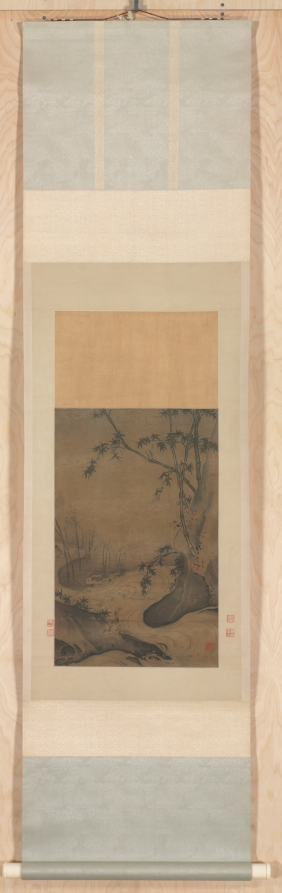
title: Bamboo and Ducks by a Rushing Stream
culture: China, Southern Song dynasty (1127–1279)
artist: Ma Yuan (Chinese, c. 1150–after 1255)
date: 1127–1279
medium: hanging scroll; ink and light color on silk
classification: Painting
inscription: 馬遠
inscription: 12 additional seals: 1 of An Kuo (1481–1534); 7 of Hsiang Yüan-pien (1525–1590); 2 of Liang Ch'ing-piao (1620–1691); 2 unidentified. (WKH)